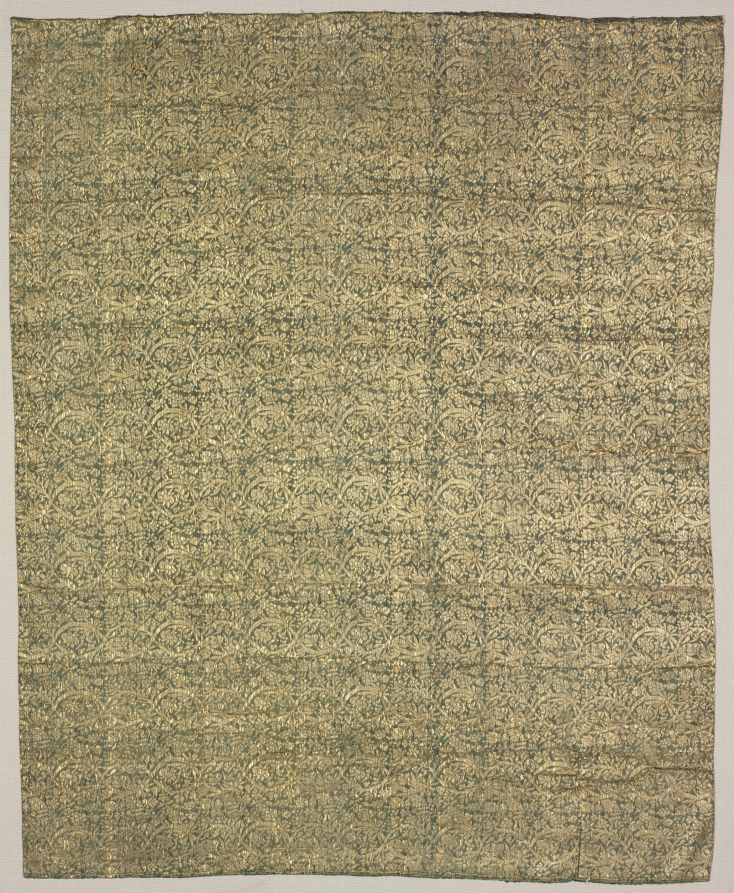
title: Fragment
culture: Iran, 19th century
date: 1800s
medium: compound weave: silk and gold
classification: Textile